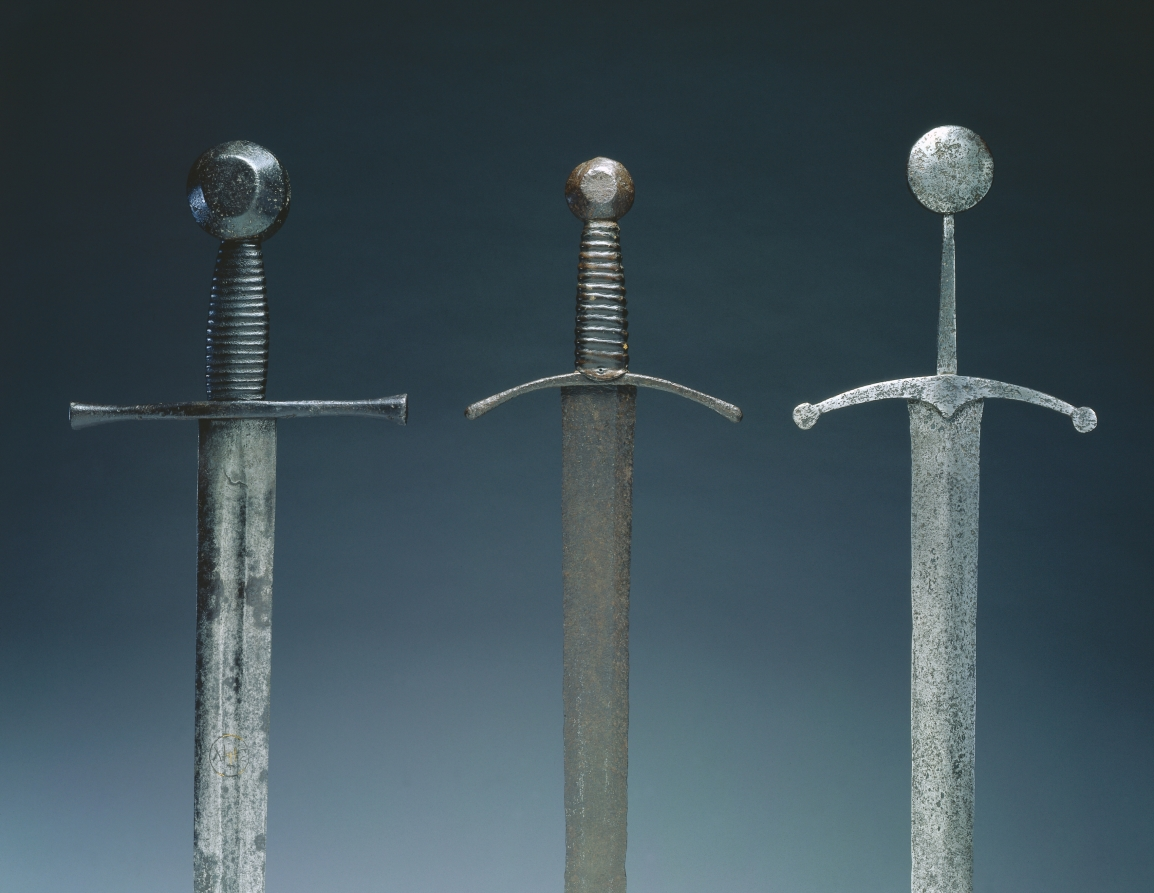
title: Sword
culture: Germany (?)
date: 1400s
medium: steel; wood and leather grip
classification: Arms and Armor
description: During medieval times, everyday objects carried deep spiritual meanings. The knight's sword was perceived as the noblest of weapons because its shape symbolized the cross on which Christ died.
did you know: The unornamented surfaces and signs of use on this sword and those similar to it lead us to believe that they were used in battle. Despite their utilitarian purpose, the blacksmith added details to the handles and hilts to make them visually appealing.